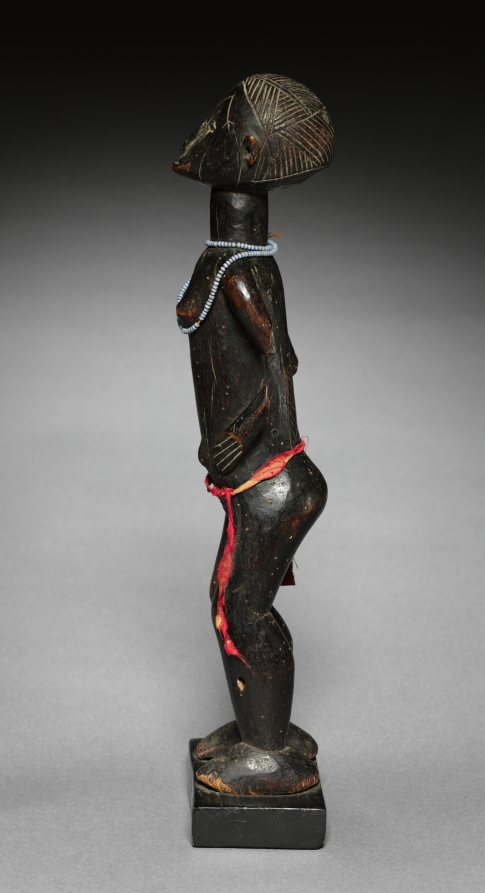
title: Female Figure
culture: Democratic Republic of the Congo, Tabwa, late 19th or early 20th century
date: 1900s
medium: Wood, cloth, glass beads, and natural fiber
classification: Sculpture